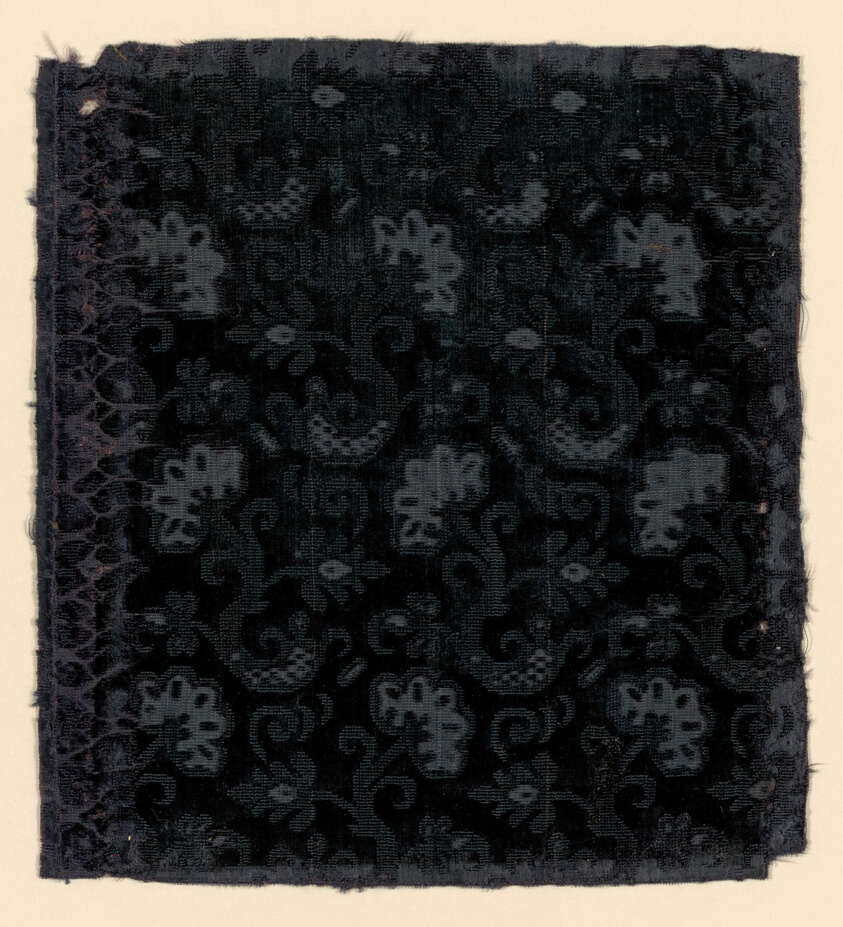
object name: Textile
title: Fragment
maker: Italy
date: first half of the 17th century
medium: Silk, velvet; cut, uncut, voided; plain weave foundation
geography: Italy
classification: textile; weaving - velvet; weaving